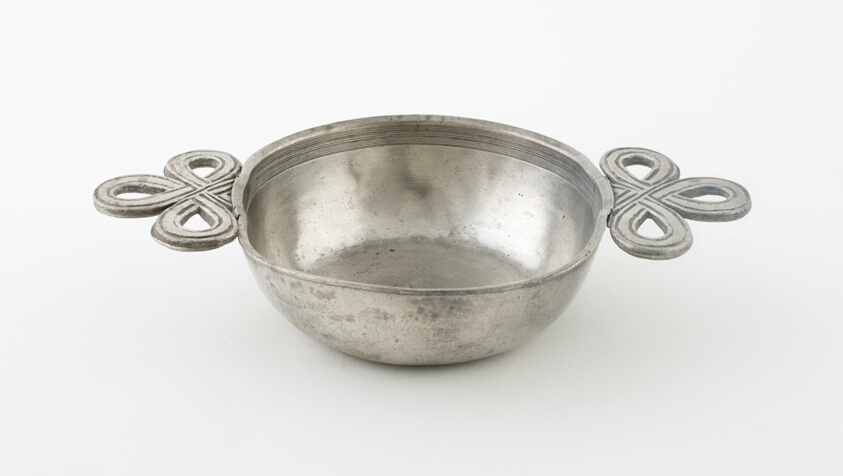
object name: Metalwork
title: Double Ribbon-Handled Porringer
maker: Netherlands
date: probably 1786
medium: Pewter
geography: Netherlands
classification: pewter; metalwork; european decorative arts